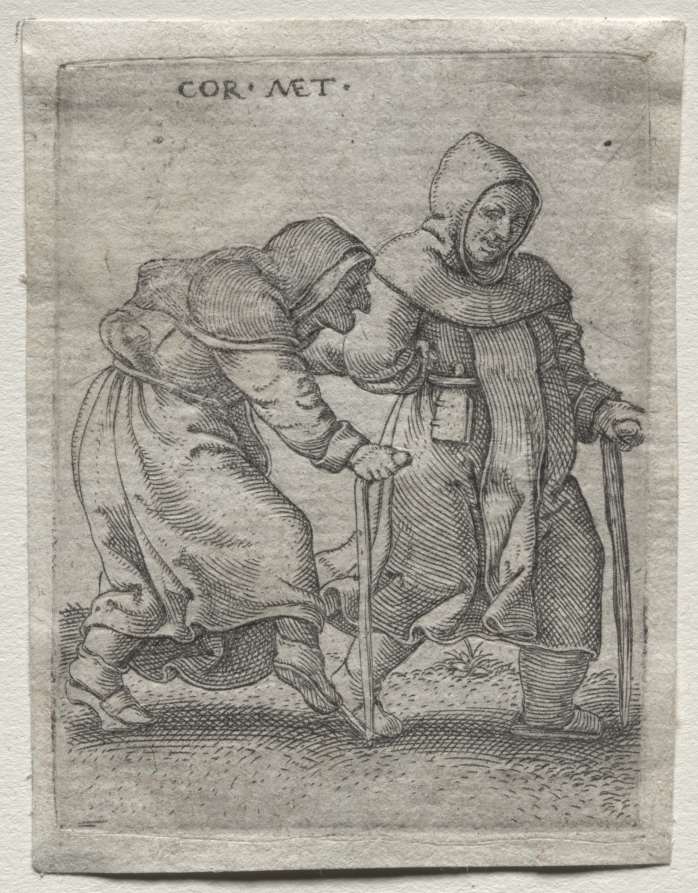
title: Dancing Cripples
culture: Flanders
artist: Cornelis Massys (Flemish, 1510/11–1556/57)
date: 1538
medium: engraving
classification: Print